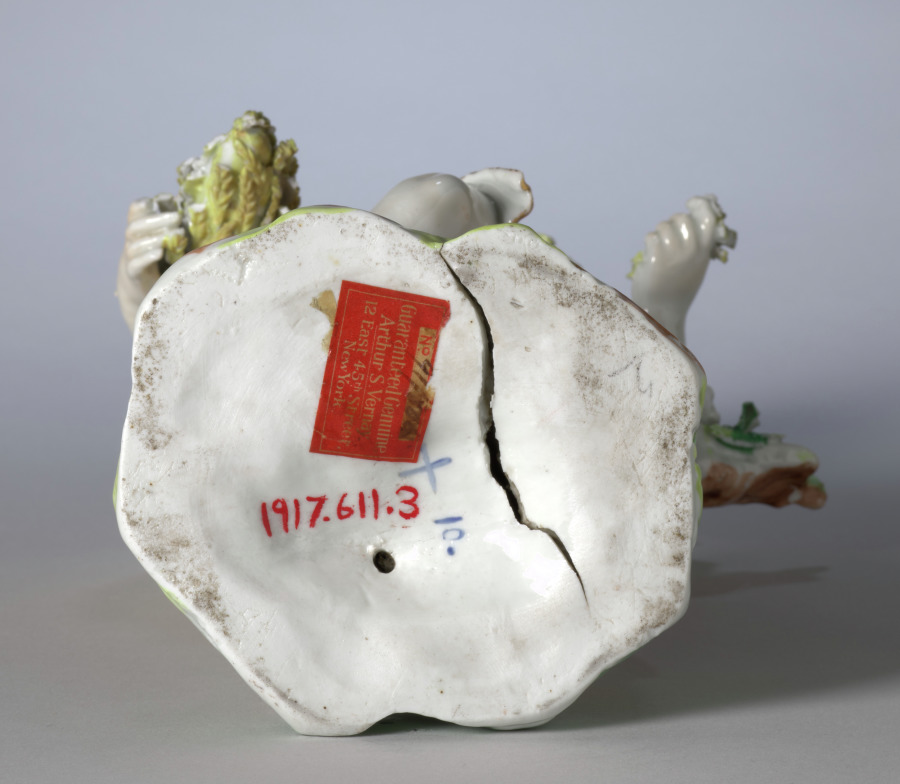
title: Figure of Summer from the Four Seasons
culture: England, Bristol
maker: Bristol Porcelain Factory (British, 1770–81)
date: c. 1775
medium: hard-paste porcelain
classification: Ceramic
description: The modern notion of childhood as a time of innocence and simplicity emerged during the second half of the eighteenth century. This understanding of adolescence led to numerous depictions of children as personifications of the four seasons. Here summer is portrayed as a young boy holding a sheaf of wheat as he leans against the beehive next to him. Both grain and honey have been associated with summer harvests and their accompanying festivals since antiquity.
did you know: Allegorical figures most often decorated a table during the dessert course, providing amusing subjects for conversation.